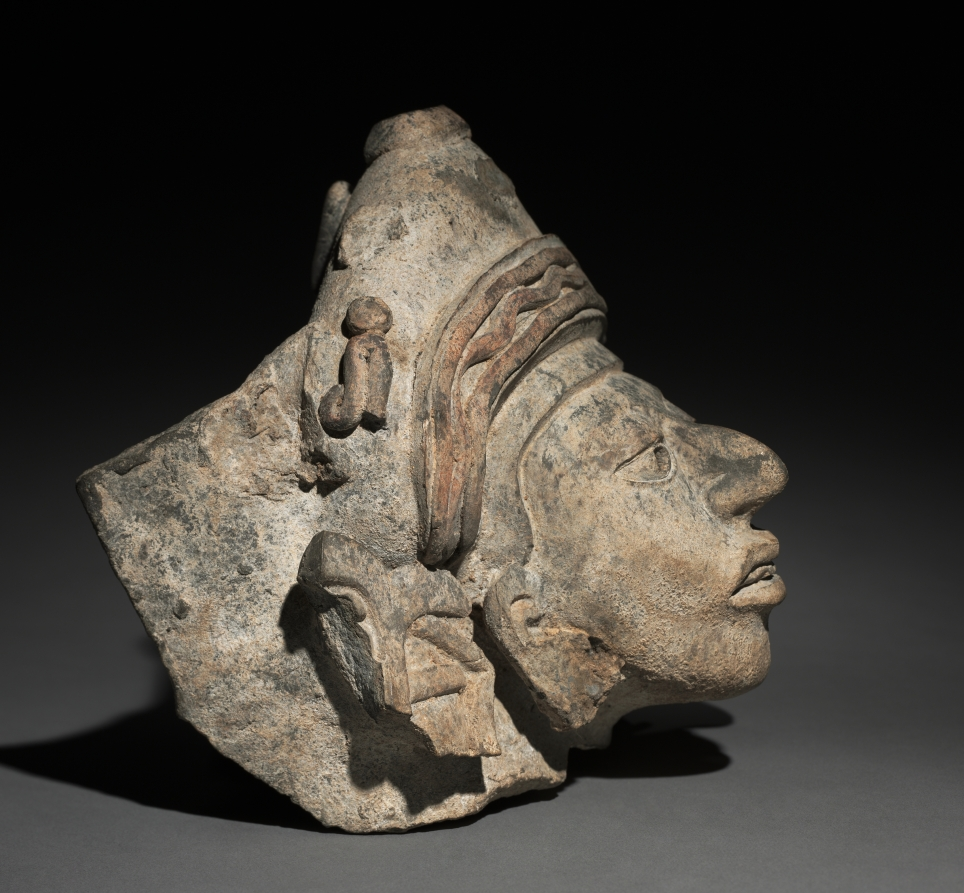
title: Urn Figure Head Fragment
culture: Mexico, Oaxaca, Zapotec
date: c. 200–500 CE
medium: earthenware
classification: Sculpture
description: The face of this fragmentary urn figure is modeled with exceptional sensitivity. The downward gaze of the drilled pupils imparts a sense of quiet alertness.